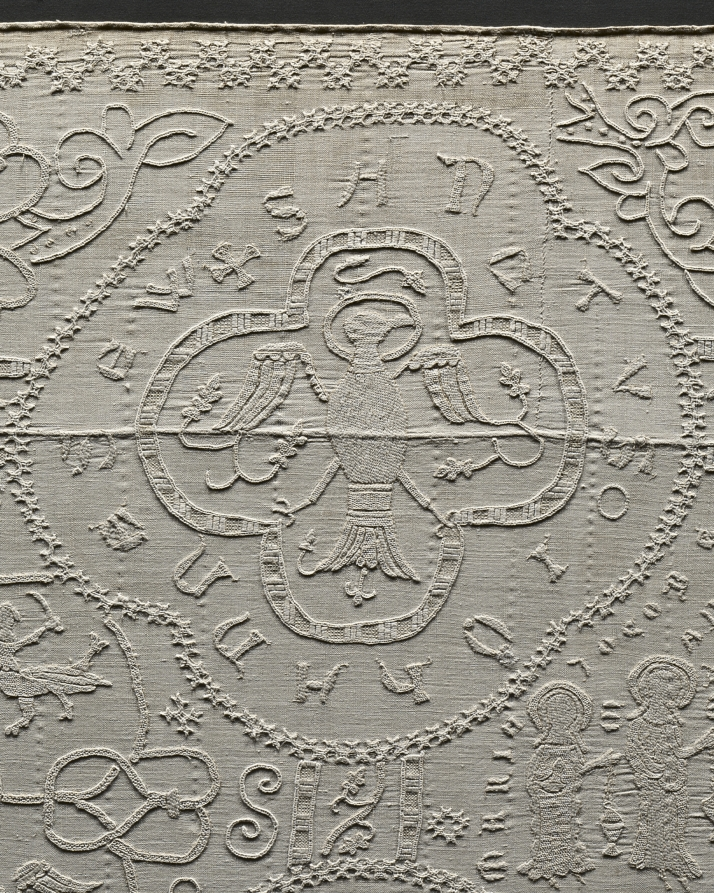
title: Altar Cloth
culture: Germany, Altenberg on the Lahn, Premonstratensian Convent, 14th century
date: c. 1350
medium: embroidery: linen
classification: Embroidery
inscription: various motifs enclosed in quatrefoils with identifying inscriptions in Gothic letters.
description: This large, embroidered altar cloth is one of the rarest, most important medieval church furnishings in existence. It was stitched by nuns in the Premonstratensian Convent in Altenberg on the Lahn River, north of Frankfurt, Germany, and was used to cover the church’s high altar in the weeks leading up to Easter. The cloth is an example of linen embroidery, a specialty of German nuns in the later Middle Ages. The Altenberg monastery church once had valuable furnishings; the high altar retable (a decorated frame with sculptures and paintings on the top of an altar) has survived, the main parts of which are now in the Städel Museum in Frankfurt, Germany.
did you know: When lit from behind, the previously hidden details emerge and the complex design becomes evident.